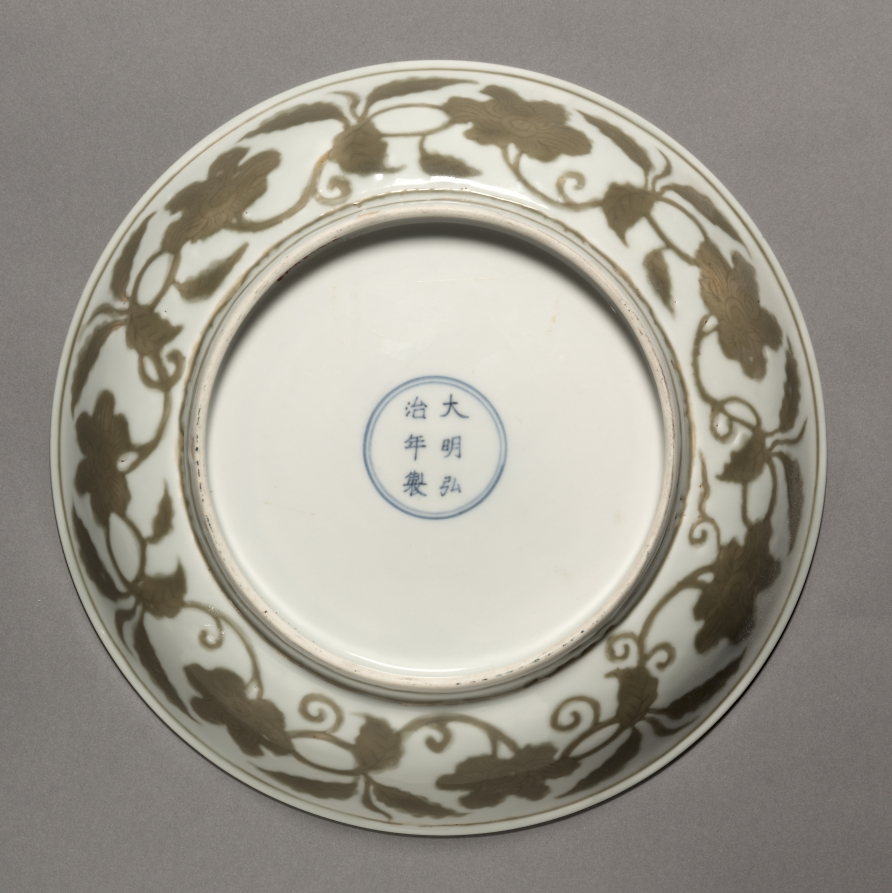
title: Dish with Spray of Gardenia amidst Pomegranate, Lotus, and Grapes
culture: China, Jiangxi province, Jingdezhen kilns, Ming dynasty (1368-1644), Hongzhi mark and reign (1488-1505)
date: 1488–1505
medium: porcelain with incised and underglaze coffee brown (iron oxide) decoration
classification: Ceramic